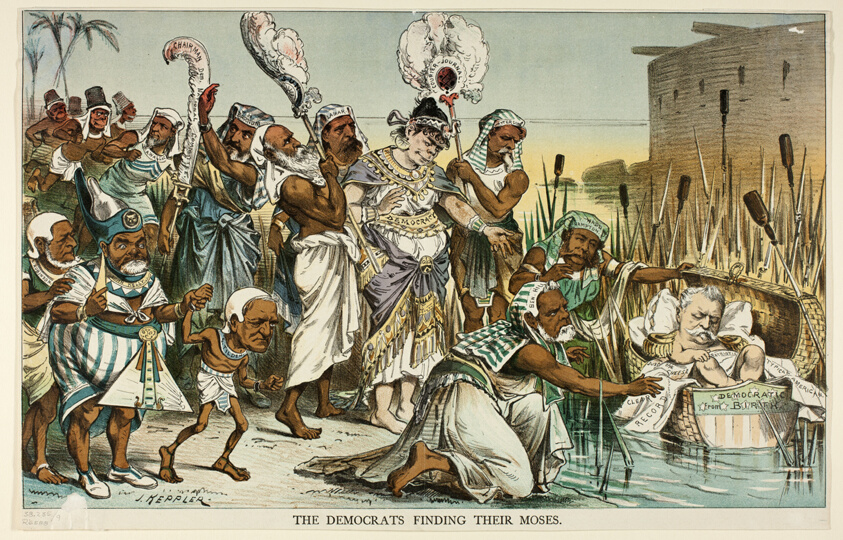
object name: Print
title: The Democrats Finding Their Moses, from Puck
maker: Joseph Keppler (American, 1838-1894)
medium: Color lithograph on newsprint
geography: United States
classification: lithograph; print; prints and drawing